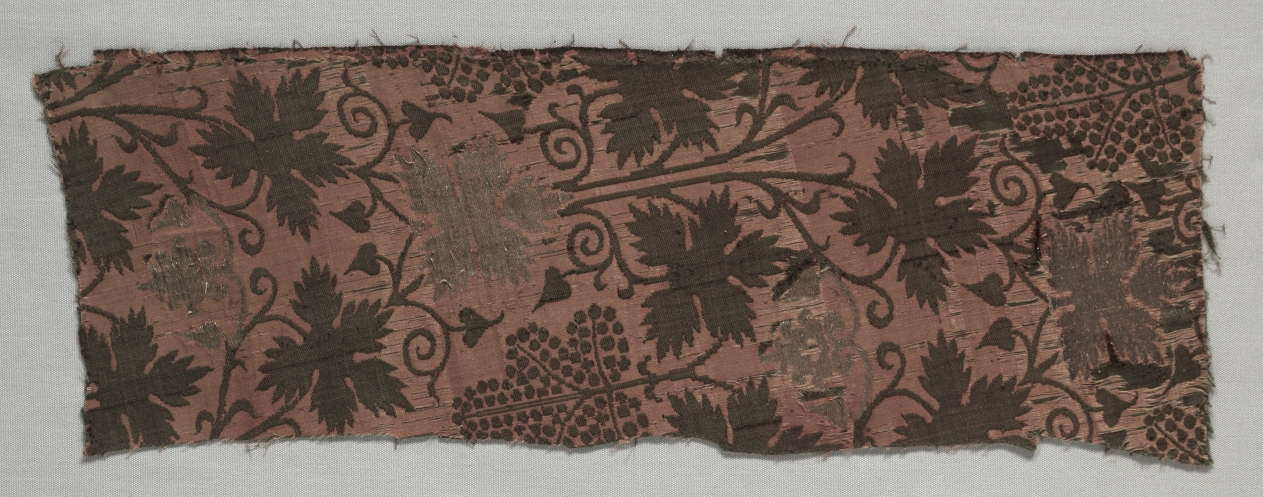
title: Brocaded Silk Fragment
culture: Italy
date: c. 1360–90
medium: silk and metal thread: lampas weave, brocaded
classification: Textile